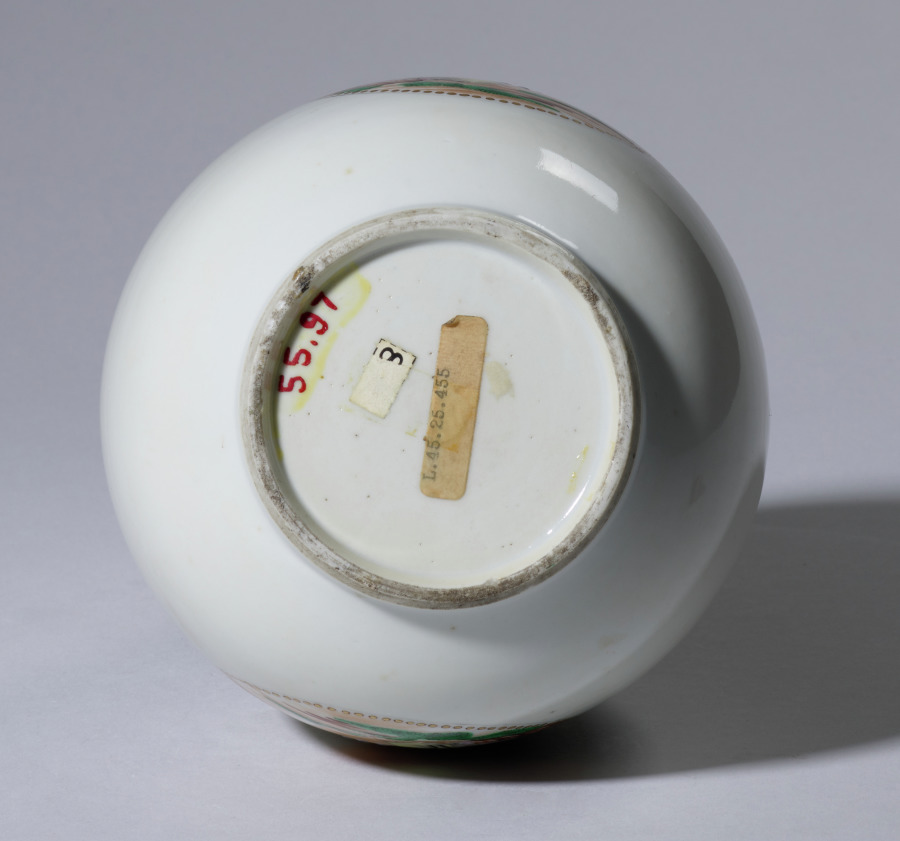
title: Bottle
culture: China, Chinese Export, early 19th century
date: c. 1800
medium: porcelain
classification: Ceramic